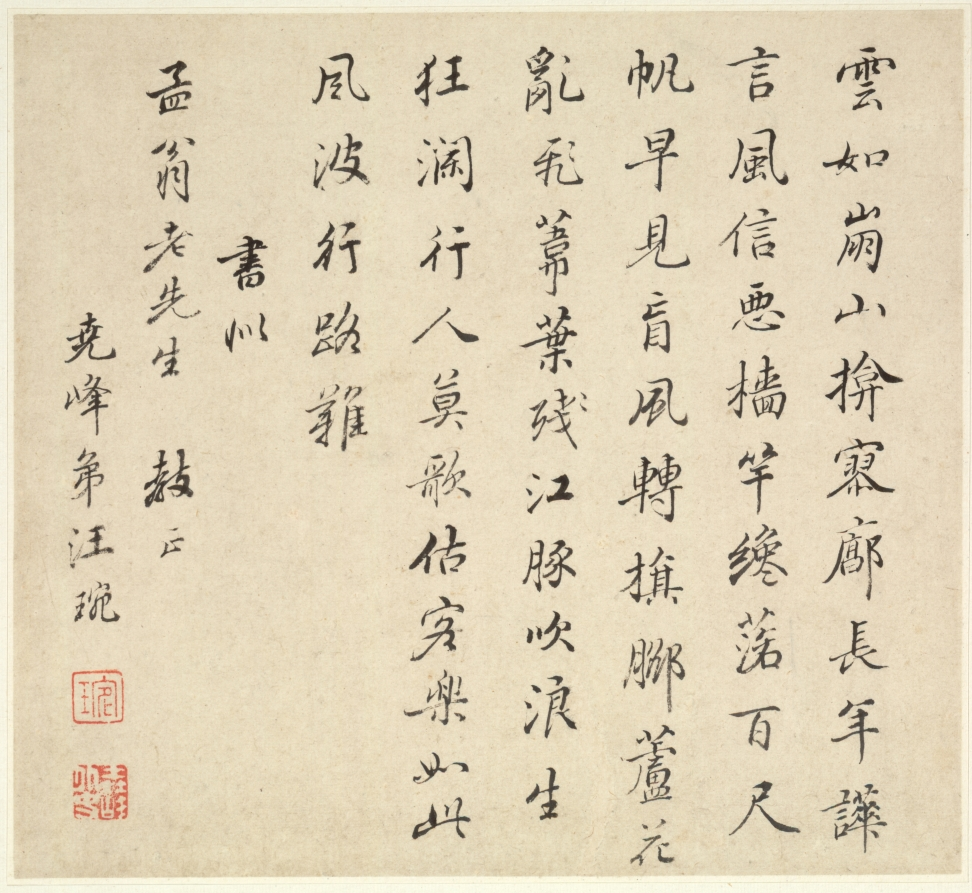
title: Album of Landscapes: Leaf 8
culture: China, Qing dynasty (1644-1911)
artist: Wang Gai (Chinese, active c. 1677–1705)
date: 1677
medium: album leaf, ink and light color on paper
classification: Painting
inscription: Artist's poem, signature, and 2 seals on leaf 8 Poem by Wang Wan